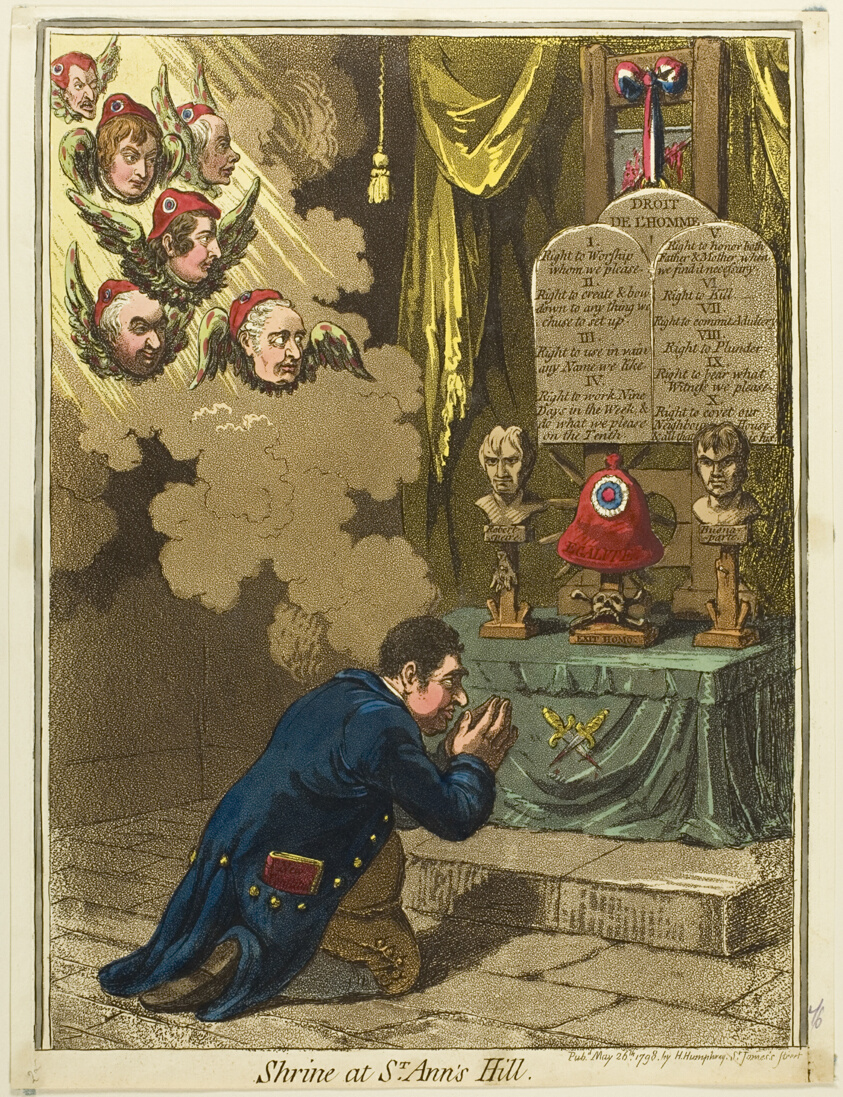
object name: Print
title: Shrine at St. Ann's Hill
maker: James Gillray (English, 1756-1815); published by Hannah Humphrey (English, c. 1745-1818)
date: published May 26, 1798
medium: Hand-colored etching and aquatint on paper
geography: England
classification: etching; print; prints and drawing